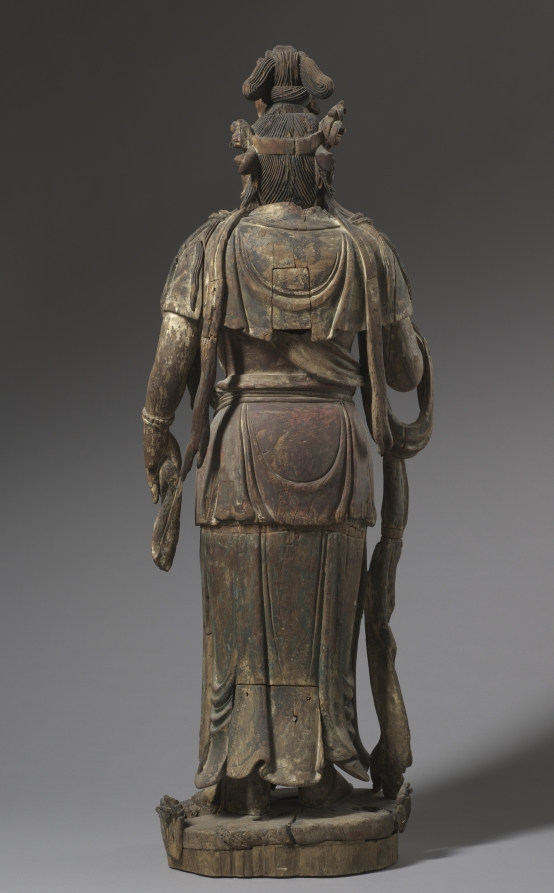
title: Standing Bodhisattva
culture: China, Jin dynasty (1115-1234)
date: 1200s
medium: wood with traces of polychromy and gold leaf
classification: Sculpture